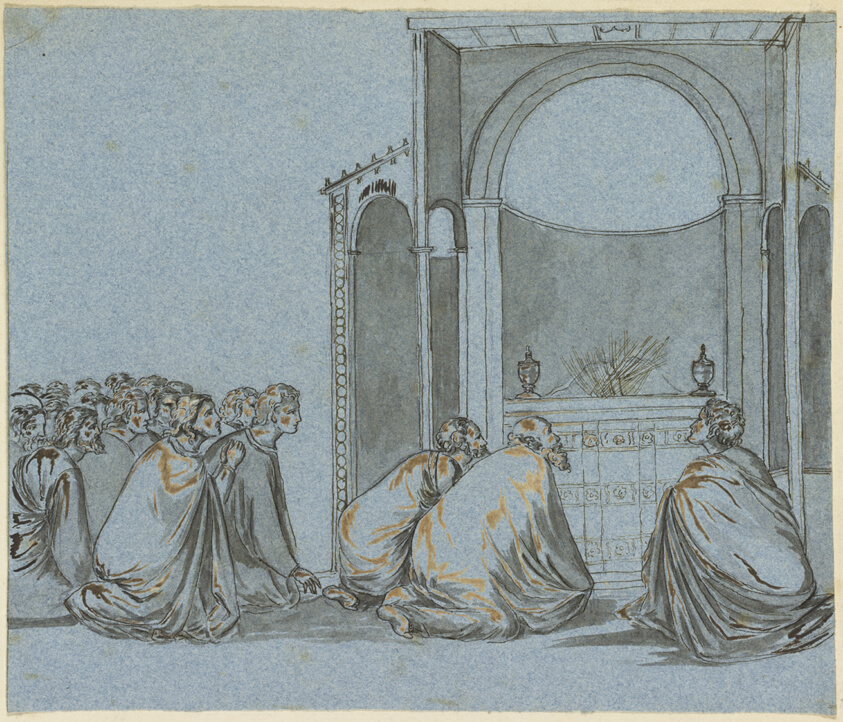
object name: Drawing and Watercolor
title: Prayer for the Flowering of the Rods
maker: after Giotto; Italian, 1266/67-1337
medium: Pen and brown ink with brush and gray wash, heightened with lead white (oxidized), on blue laid paper, tipped on to cream laid paper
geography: Italy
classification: ink with wash; drawings (visual works); prints and drawing